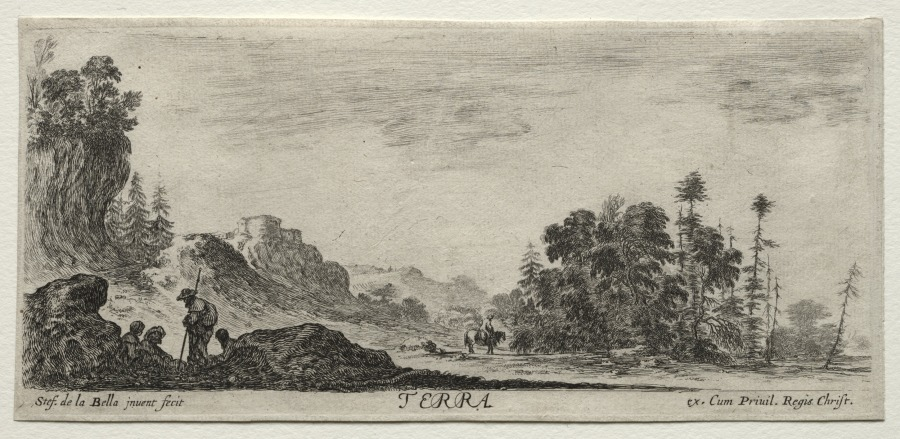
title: The Four Elements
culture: Italy, 17th century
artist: Stefano Della Bella (Italian, 1610–1664)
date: c. 1648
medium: etching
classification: Print